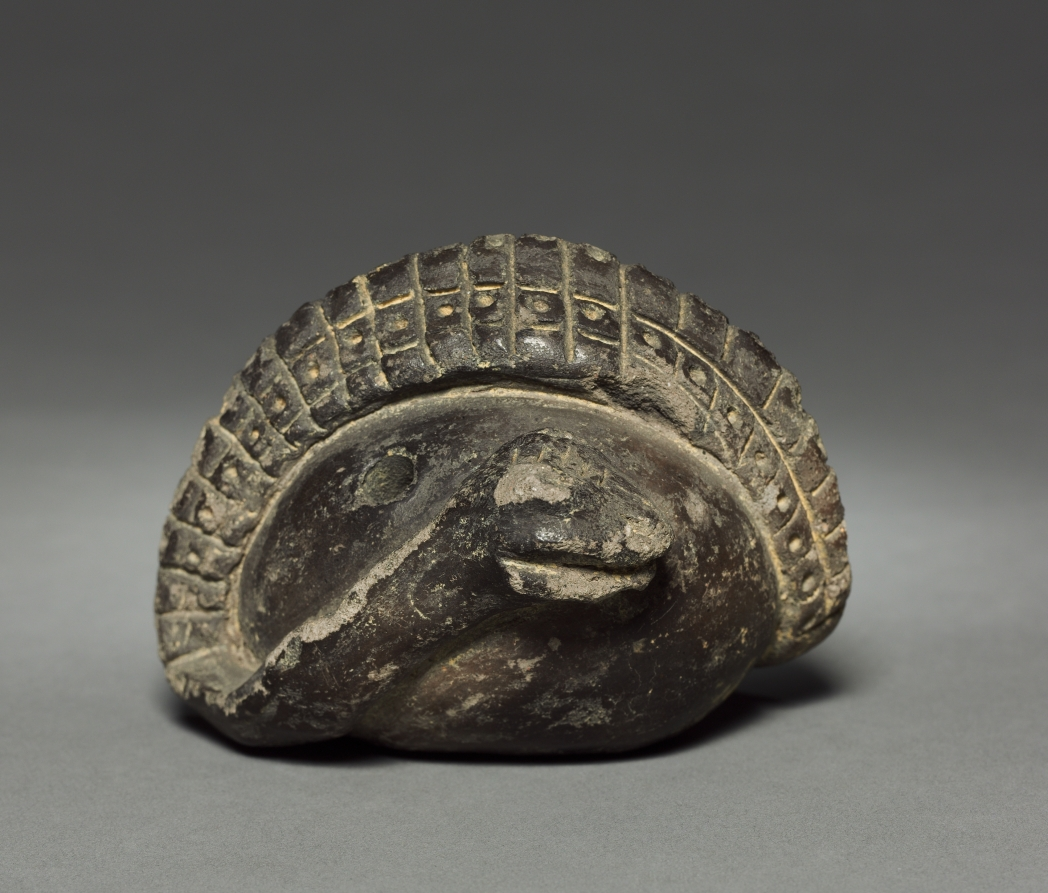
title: Coiled Snake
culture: Colombia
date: before 1921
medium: pottery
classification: Ceramic